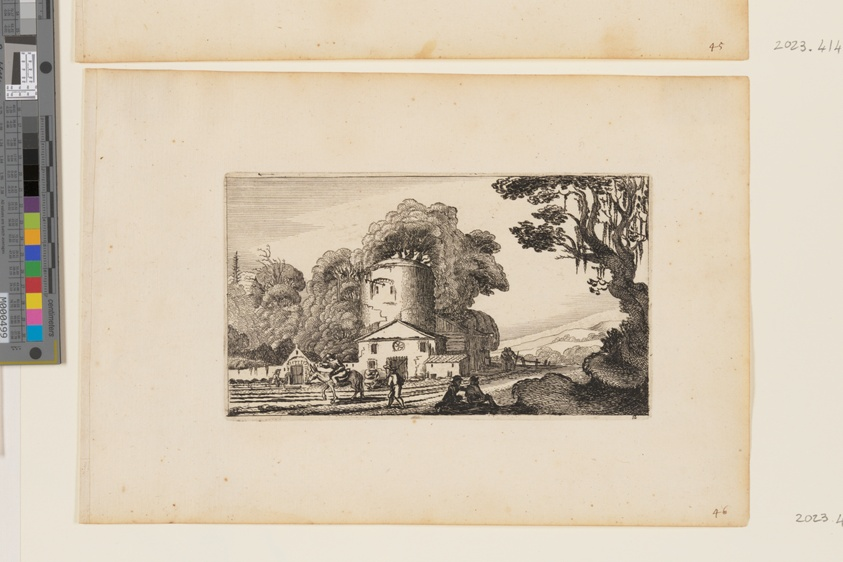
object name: Print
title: Path Before Farm Dominated by a Round Tower, from Twelve landscapes with Figures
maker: After Gillis van Scheyndel; Dutch, 1595–1660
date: 1624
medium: Etching on ivory laid paper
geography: Netherlands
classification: etching; paper; print; prints and drawing